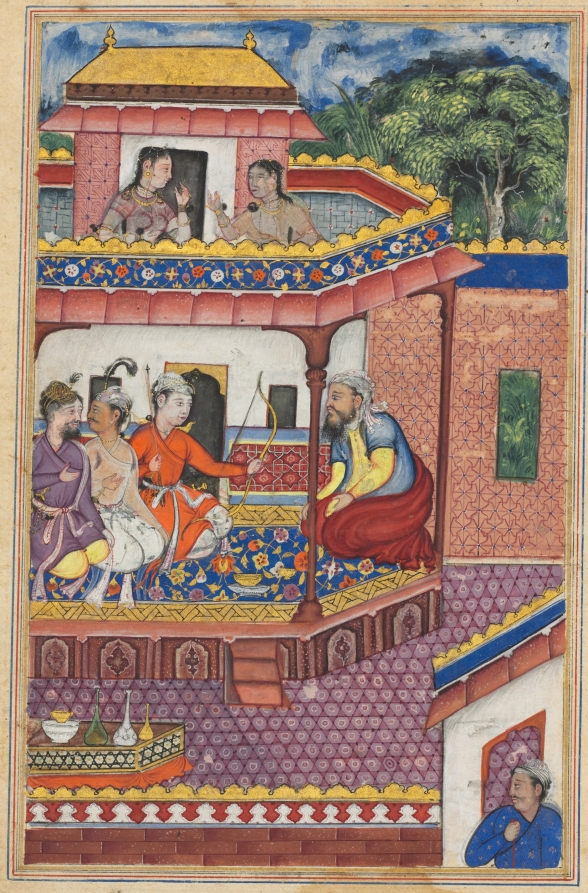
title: The three young men present themselves as suitors for the hand of Zuhra, the daughter of the merchant of Kabul, from a Tuti-nama (Tales of a Parrot): Thirty-fourth Night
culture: Mughal India, court of Akbar (reigned 1556–1605)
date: c. 1560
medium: gum tempera, ink, and gold on paper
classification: Painting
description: Above, two women listen as three suitors address the merchant of Kabul. Each hopes to prove himself worthy of marrying the merchant’s daughter, Zuhra. The first is skilled in divination; the second can bring carved wooden horses to life, and the third is a talented archer. Before Zuhra can select a husband, she is kidnapped by an evil fairy.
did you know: Zuhra is also the name of the planet Venus.